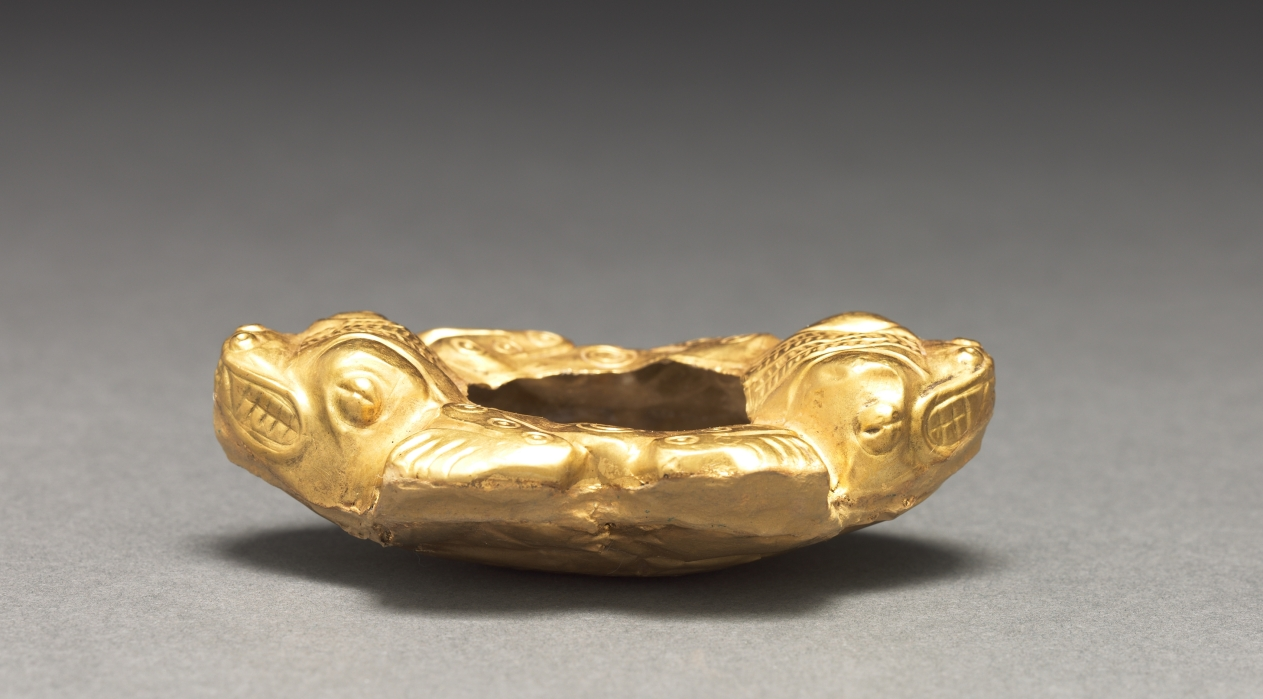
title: Double Crocodile Vessel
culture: Central Panama, (Sitio Conte?), Conte Style, 5th-10th Century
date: c. 400–900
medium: hammered and embossed gold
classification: Metalwork